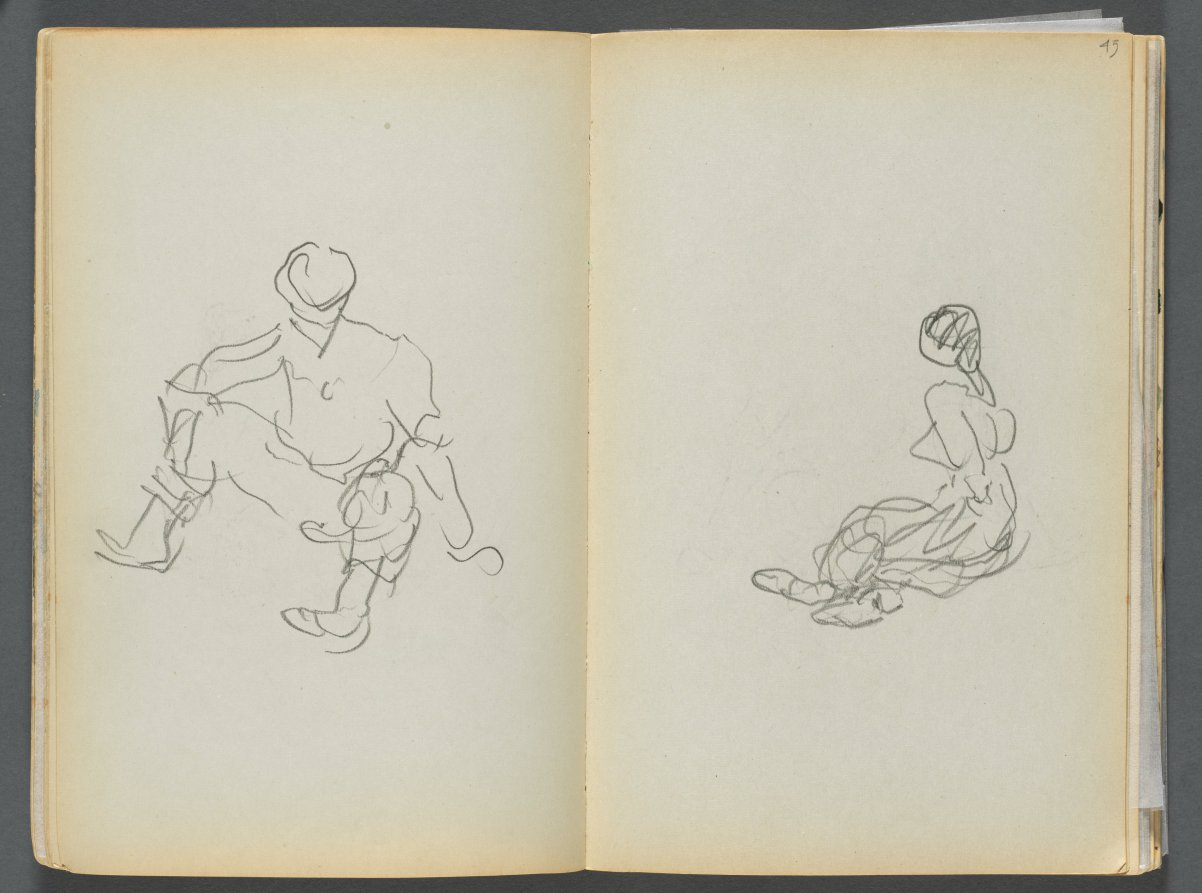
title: Sketchbook- The Granite Shore Hotel, Rockport, page 044 & 45: Male and Female Seated Figures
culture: America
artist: Maurice Prendergast (American, born Newfoundland [now Canada], 1858–1924)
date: 1905–10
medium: graphite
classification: Bound Volume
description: This sketchbook contains 72 pages of pencil drawings and 9 watercolors of Cape Ann. On the inside of the cover Prendergast wrote the address of the Granite Shore Hotel in Rockport, Massachusetts.